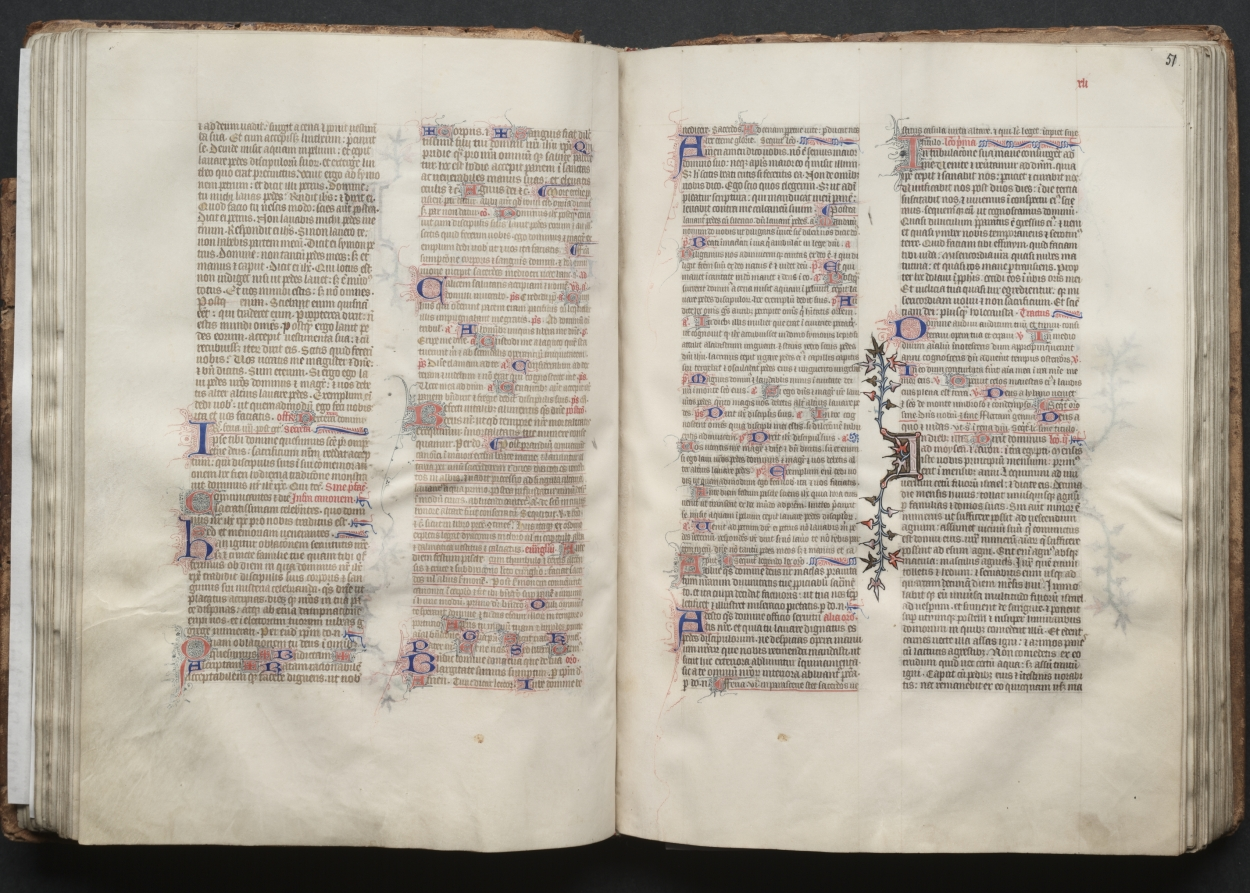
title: The Gotha Missal: Fol. 50v, Text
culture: France, Paris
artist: Master of the Boqueteaux (French)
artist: and Workshop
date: c. 1375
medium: ink, tempera, and gold on vellum; blind-tooled leather binding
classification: Bound Volume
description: The style and quality of this manuscript's decoration is typical of deluxe Parisian books made for aristocratic or royal patrons. Most of the book's decoration appears to be the work of the Master of the Boqueteaux, an artist active at the court of King Charles V (died 1380). His style was apparently shared by a number of book illuminators working in and around Paris. It is very possible that the Gotha Missal belonged to Charles V, but is not provable because the manuscript has no royal portraits and lacks a colophon. Given the book's magnificent decoration, however, it would seem that it was produced for a Valois prince, if not for the king himself. The manuscript receives its name from the German dukes of Gotha, its later owners.